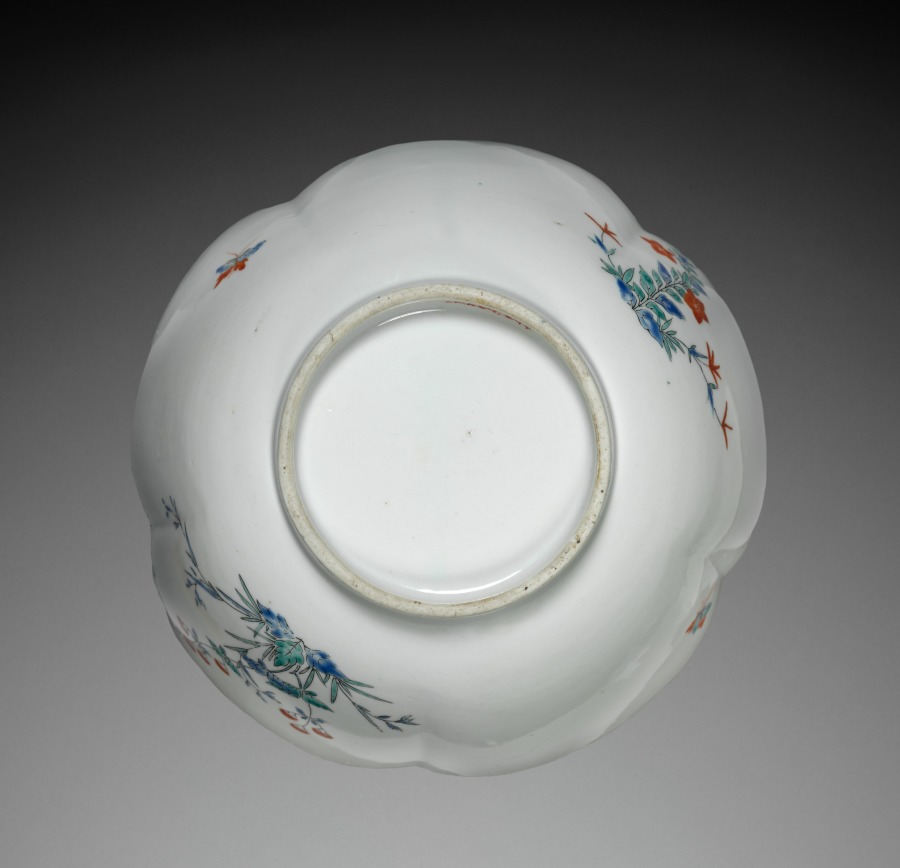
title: Bowl with Butterflies and Flowers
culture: Japan, Edo period (1615–1868)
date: c. 1700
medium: porcelain molded in five lobes, with overglaze color enamel (Hizen ware, Kakiemon type)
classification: Ceramic